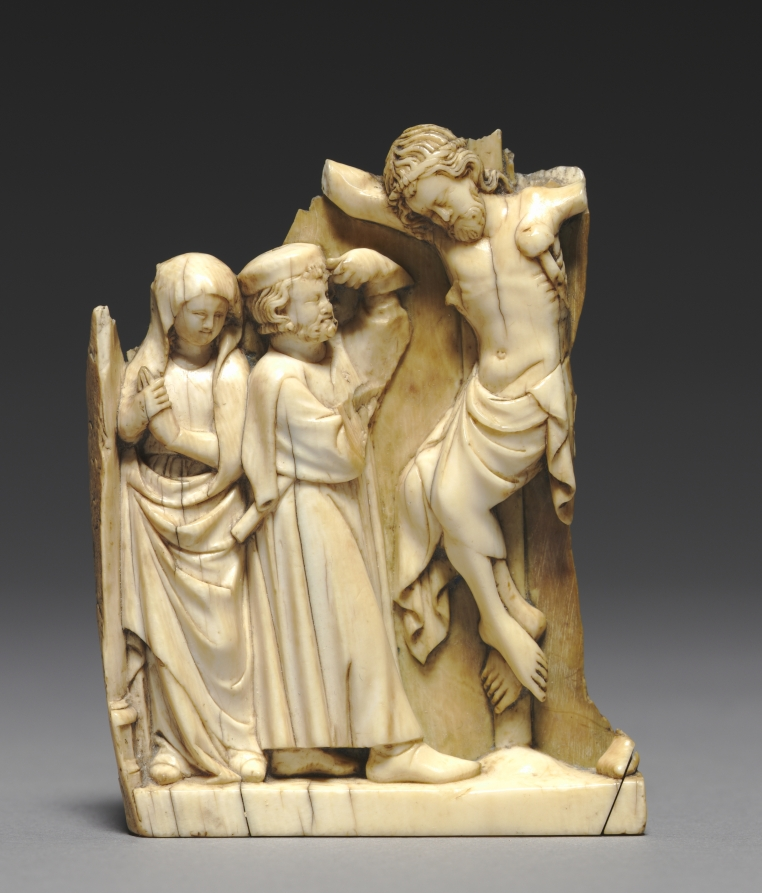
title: The Crucifixion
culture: France, Paris?, Gothic period, late 13th-early 14th century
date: c. 1290–1320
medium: ivory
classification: Ivory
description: Flanking the crucified Christ, the figures of Longinus and the Virgin appear on this fragment of an exquisitely carved ivory panel. Now lost are the figures of Stephaton and Saint John. However, Stephaton’s right foot and the vinegar-soaked sponge on a pole are still visible where the ivory breaks off.